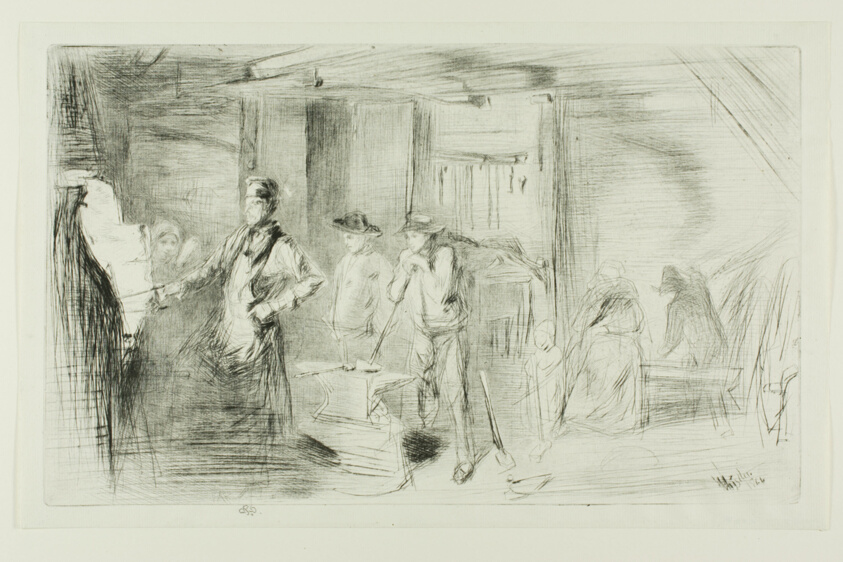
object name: Print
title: The Forge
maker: James McNeill Whistler (American, 1834-1903)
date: 1861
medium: Drypoint in black ink on ivory laid paper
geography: United States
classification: drypoint; print; prints and drawing; paper